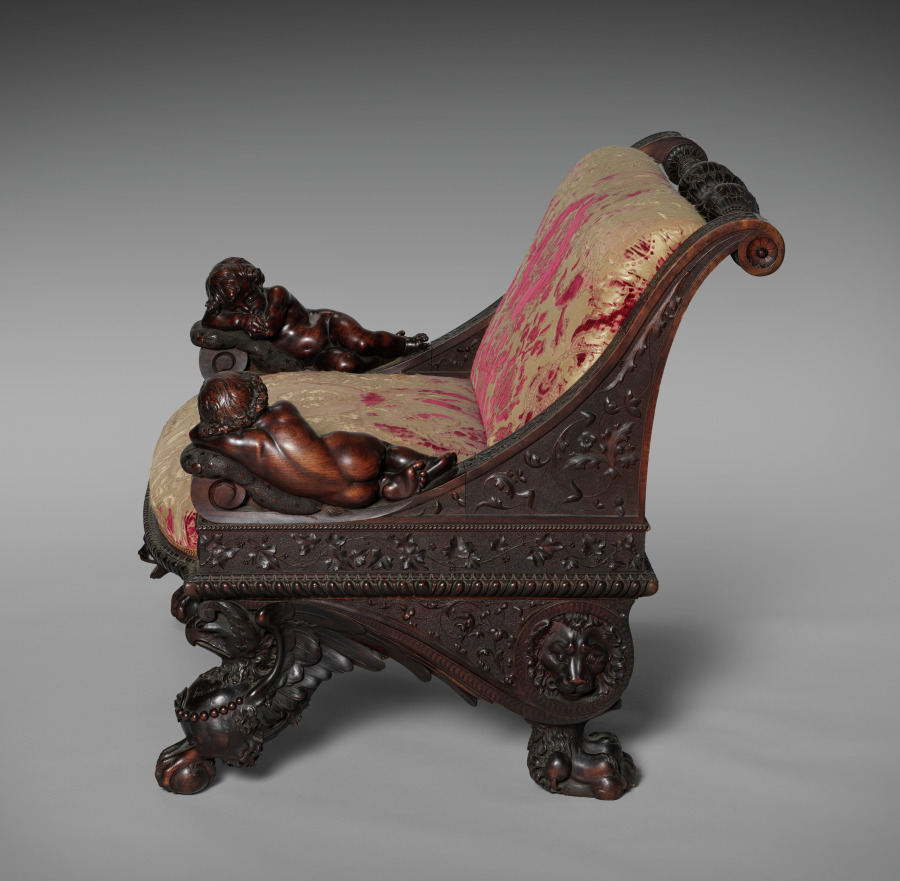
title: Armchair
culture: Italy, Florence, 19th century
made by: Luigi Frullini (Italian, 1839–1897)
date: 1876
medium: walnut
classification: Furniture and woodwork